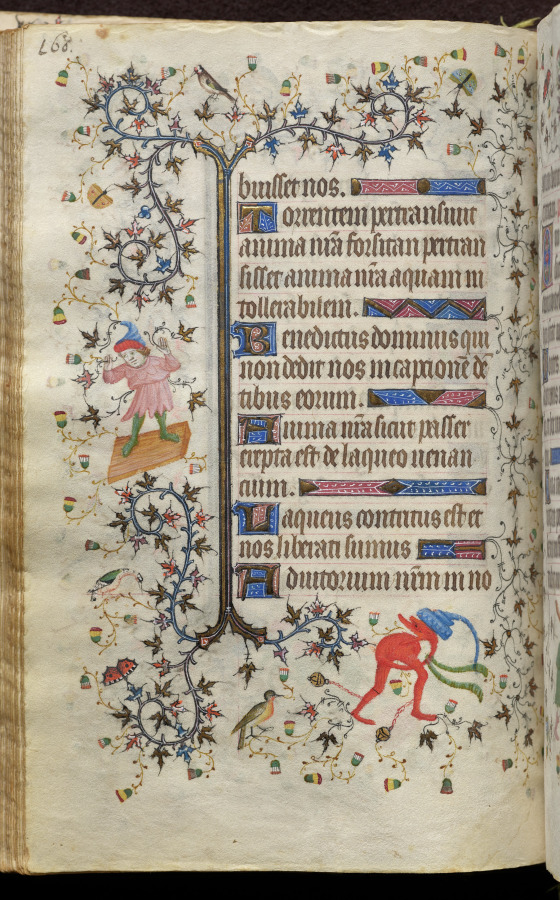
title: Hours of Charles the Noble, King of Navarre (1361-1425): fol. 80v, Text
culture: France, Paris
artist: Master of the Brussels Initials and Associates (French)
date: c. 1405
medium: ink, tempera, and gold on vellum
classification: Bound Volume